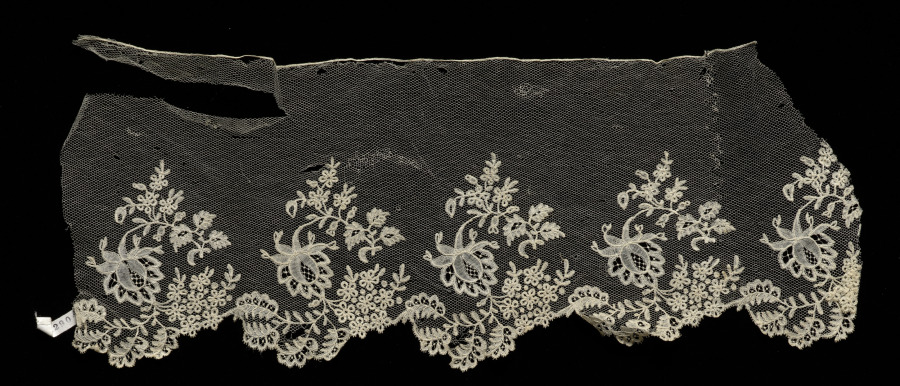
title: Lace Flounce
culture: Belgium; Brussels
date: 1800s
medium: Bobbin lace (point plat appliqué) applied to machine-made net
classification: Lace